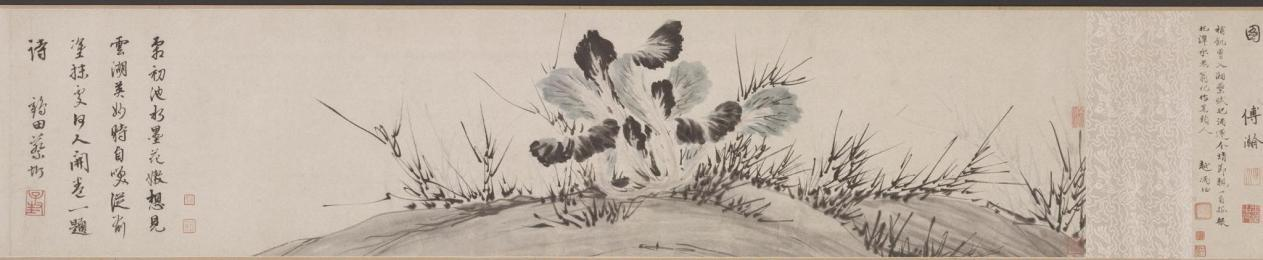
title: Chrysanthemums and Cabbage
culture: China, Ming dynasty (1368–1644)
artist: Tao Cheng (Chinese, active c. 1471–after 1502)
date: c. 1486 or before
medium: handscroll, ink and slight color on paper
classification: Painting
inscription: Artist's seal at beginning of painting: Yun hu 雲湖. Title by Wang Wenzhi 王文治 (1730–1802), date 1756. 2 seals of Wang Wenzhi 王文治 (1730-1802); 3 seals of Ku Yün (n. d.)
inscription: Section A (Chrysanthemums): 1 poem and 1 seal of Zhang Yuanzhen 張元禎 (1437–1507) - Jinshi, 1461; 1 poems and 3 seals of Ni Yue 倪岳 (1444–1501) - Jinshi, 1464; 1 poems and 2 seals of Zhao Xiang 趙祥 (life dates unknown) - Jinshi, 1469; 1 poems and 1 seals of Wu Xixian 吳希賢 (1437–1489) - Jinshi, 1464; 1 poems and 1 seals of Lü Chang 呂㦂 (1449–1511) - Juren, 1471; 1 poems and 3 seals of Fu Han 傅瀚 (1435–1502) - Jinshi, 1464; 1 poems and 1 seals of Feng Jue 馮珏 (life dates unknown) - Jinshi, 1478.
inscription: Chrysanthemums section, poem 1, by Zhang Yuanzhen 張元禎 (1437–1507): Several bushes of chrysanthemums grow in front of the Five-Willow Cottage,/ The yellow ones are really yellow and the white ones white./ This affable and decent fellow, young in years and unsophisticated,/ Has snapped one of the branches to dip in ink. (The Five-Willows Cottage was the home of the poet Tao Qian 陶潛 (Tao Yuanming 陶淵明, AD 365-427).) Chrysanthemums section, poem 2, by Ni Yue 倪岳 (1444–1501): Where at the Eastern Fence can you grieve for the Soul of the Xiang River?/ A man of upright character is mourned within the traces of ink./ White jade with a slight flaw would be a grievance forever,/ Later men should understand why even the roots of the flowers are washed. (Eastern Fence refers again to the poet Tao Qian 陶潛, while the Soul of the Hsiang River refers to the poet Qu Yuan 屈原 (c. 340–278 BC).) Chrysanthemums section, poem 3, by Zhao Xiang 趙祥 (life dates unknown): A clump of chrysanthemum grows in front of the bamboo pavilion,/ The winds of many autumns have blown since we parted beyond the river./ Straining wine through the official's cap of Tao [Qian] to prolong autumn's pleasures,/ The mists and clouds of ten thousand miles belong to the intoxicated. Chrysanthemums section, poem 4, by Wu Xixian 吳希賢 (1437–1489): It is a different spring if mulberry is planted during the latter part of the year,/ The dust of the world originally did not drop on clothing./ Who spills out ink under the Eastern Fence/ And paints so freely this portrait of chrysanthemums for the venerable Sir Tao? Chrysanthemums section, poem 5, by Lü Chang 呂㦂 (1449–1511): This full tray of ink for painting [flowers] at the Eastern Fence;/ Their whiteness or yellowness is not essential in capturing their beauty./ I don't have to go to Jiangnan to see them myself./ At my old house grow two or three branches. Chrysanthemums section, poem 6, by Fu Han 傅瀚 (1435–1502): Who daubed autumn flowers with ink/ As if they were dark dew on a branch tip only vaguely seen at evening?/ After the lazy clouds disperse, no one paints;/ A certain unconventionality pervades this painting. Chrysanthemums section, poem 7, by Feng Jue 馮珏 (life dates unknown): To satisfy his hunger, [the chrysanthemums] have at times entered the poetry of Qu Yuan;/ Taking up the wine cup, it felt close to Tao Qian./ [With them I am like] a lonely root sustained by deep water/ Or an old man to whose hair the color of youth returns.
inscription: Section B (Cabbage): 1 poem and 1 seal of Cai Qi 蔡圻 (life dates unknown) - degree information not known; 1 poems and 3 seals of Ni Yue 倪岳 (1444–1501) - Jinshi, 1464; 1 poem and 3 seals of Jiao Fang 焦芳 (1436–1517) - Jinshi, 1464; 1 poem and 3 seals of Li Dongyang 李東陽 (1447–1516) - Jinshi, 1464; 1 poems and 1 seals of Wu Xixian, signed “Xixian” 吳希賢 - Jinshi, 1464; 1 poems and 3 seals of Fu Han 傅瀚 (1435–1502) - Jinshi, 1464; 1 poems and 1 seals of Lü Chang 呂㦂 (1449–1511) - Juren, 1471; 1 poems and 2 seals of Zhao Xiang 趙祥 (life dates unknown) - Jinshi, 1469; 1 poems and 1 seals of Feng Jue 馮珏 (life dates unknown) - Jinshi, 1478.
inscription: Cabbage section, poem 1, by Cai Qi 蔡圻 (life dates unknown): The ink splashes are fresh from a frosty brush dipped in pond water;/ I can visualize that time when Yunhu 雲湖 [Tao Cheng] first showed his talents./ I lament the places where I scribbled before,/ Who would open them to inscribe a poem? (The first line is an allusion to the famous Jin dynasty calligrapher Wang Xizhi 王羲之 (AD 303-361), who practiced calligraphy so diligently at the edge of a pond that the water turned black with ink.) Cabbage section, poem 2, by Ni Yue 倪岳 (1444–1501): After rain the vegetables begin to grow;/ How are the colors of the masses lately!/ Once you get used to them, the tastiest parts are the ends of the roots;/ I don't know if they can be used for "seasoning soup." ("Seasoning soup" is an allusion to the statesmanship of a chief minister.) Cabbage section, poem 3, by Jiao Fang 焦芳 (1436–1517): This crop of purple stalks and green leaves is late and irregular;/ Now the rainy season is over for the Eastern Garden./ All the nobles nowadays dine on meat;/ Who of them knows the flavor of this [cabbage]. Cabbage section, poem 4, by Li Dongyang 李東陽 (1447–1516): It's always helped the honest man to sober up after drinks./ I intend to go to the deepest part of the stream-crossed garden/ To refresh myself in the fragrance and dew of evening. Cabbage section, poem 5, by Wu Xixian 吳希賢 (1437–1489): After rain, the white silk is filled with fragrant vegetables;/ How many times this happens in Mr. Tao's paintings./ On whom will you depend to present a memorial to the ruler?/ Don't let this color emerge on the faces of the people. (The last line is meant as a warning to officials: the color of the vegetables (green) may be pleasing in itself, but when it emerges on the faces of the starving poor, it signifies a badly governed world.) Cabbage section, poem 6, by Fu Han 傅瀚 (1435–1502): For twenty years I have feasted on the excellent mutton of an official;/ Yet I talk and dream about the garden and its vegetables./ Do not merely say it is good to chew the root of the cabbage--/ You must taste to understand what poverty is. Cabbage section, poem 7, by Lu Chang 呂㦂 (1449–1511): The capital is never a place for an apprentice in the "garden of scholarship."/ Who would write about gardens and vegetables on an examination paper?/ I've walked throughout the country in spring;/ Make sure the people don't show this color. Cabbage section, poem 8, by Zhao Xiang 趙祥 (life dates unknown): After a wash of rain, the spring garden is still in order;/ The flavor [of the cabbage] is more suitable with a small drink and the hum of a tune./ The rich and powerful in their mansions consume dish after dish of meat;/ Vegetarian food is known only by the scholars. Cabbage section, poem 9, by Feng Jue 馮珏 (life dates unknown): A new cabbage is nourished with dew;/ It takes a long time to grow and mature./ The business of "seasoning the soup" is your responsibility;/ Better command the gardener to take care [of the cabbages]. trans. HK/LYSL/WKH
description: On an autumn day in Beijing, Tao Cheng had a gathering with a group of scholar-officials and created two paintings in a spontaneous, casual style. The first depicts chrysanthemums, slender bamboo stalks, and a rock in monochrome ink. Tao applied light colors for the second painting that depicts cabbage. Tao deliberately placed the images on the first sections of the paper so that his honorable guests could add their poetic inscriptions inspired by his imagery. In the first section to the right, all seven poetic inscriptions refer to the beloved poet and recluse Tao Qian (also called Tao Yuanming, AD 365–427) who was particularly known for his profound love for chrysanthemum flowers. Most of the inscriptions in the second section express sympathy for the poor, since cabbage is the main ingredient in their humble food. Taken together, the poems and paintings allude to the life and responsibilities of the scholar-official: the importance of both an upright character and a concern for the poor citizens in order to achieve good government.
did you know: Eminent calligrapher Wang Wenzhi 王文治 was only 27 sui when he wrote the title in 1756.